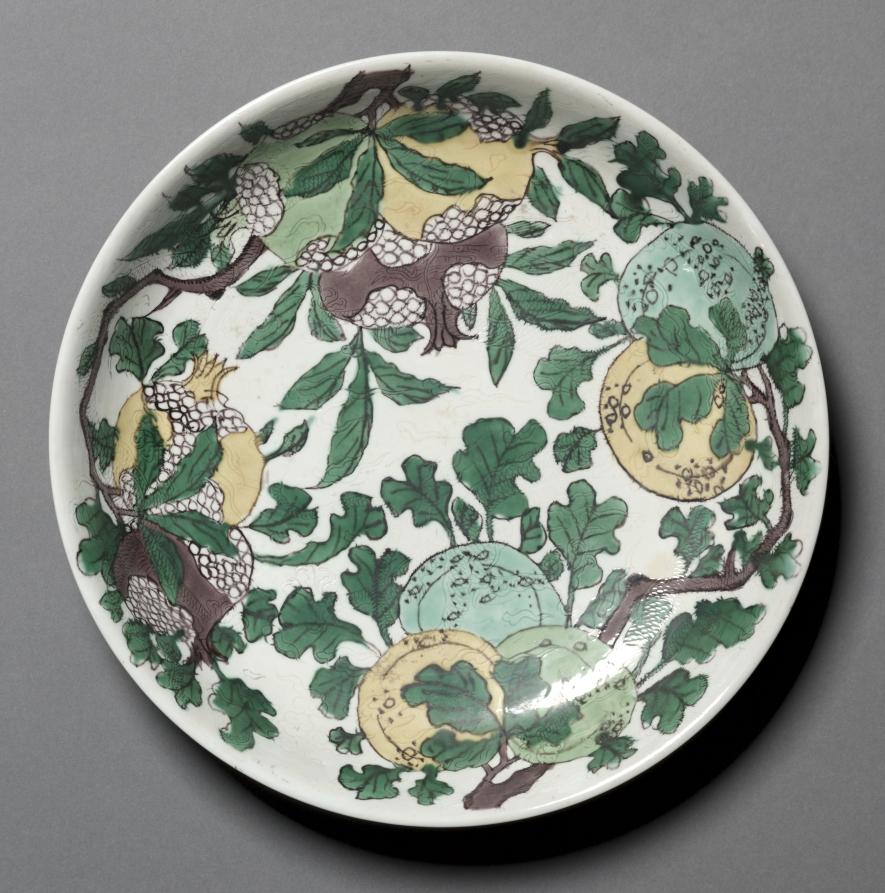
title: Dish with Dragons, Pomegranates, and Peaches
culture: China, Jiangxi province, Jingdezhen, Qing dynasty (1644-1911), Kangxi mark and period (1662-1722)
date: 1662–1722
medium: Porcelain with incised and enamel decoration, susancai ware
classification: Ceramic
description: Various techniques are applied to the decoration of susancai or "plain three-color" ware. The hidden dragons are incised, over which are painted decoration of fruit and flower sprays outlined with black pigment and colored with yellow, green, turquoise, and purplish brown enamels. The ground is filled with ivory enamel over unglazed clay.